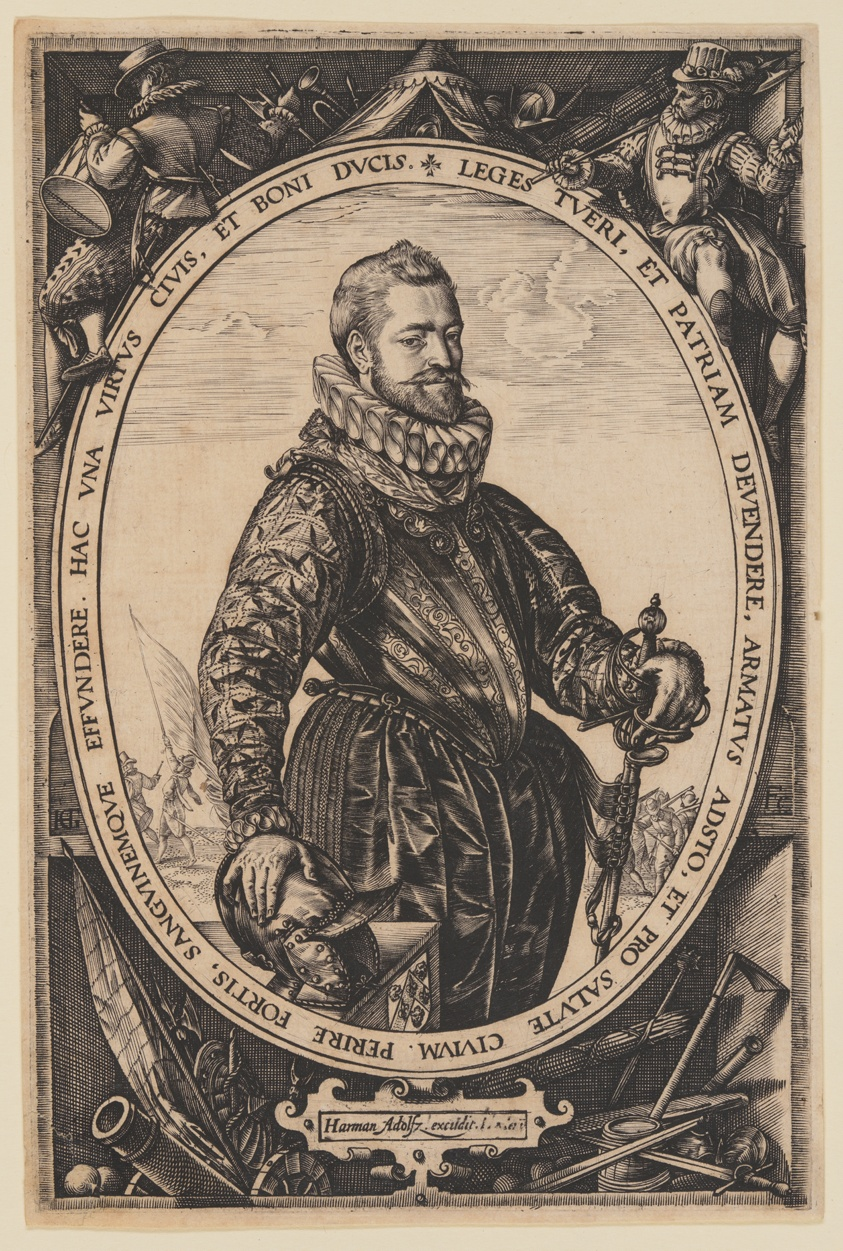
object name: Print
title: Portrait of Jacques de la Faille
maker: Hendrick Goltzius (Dutch, 1558–1617)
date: 1580, printed after 1607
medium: Engraving on ivory laid paper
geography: Netherlands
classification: engraving; paper; print; prints and drawing